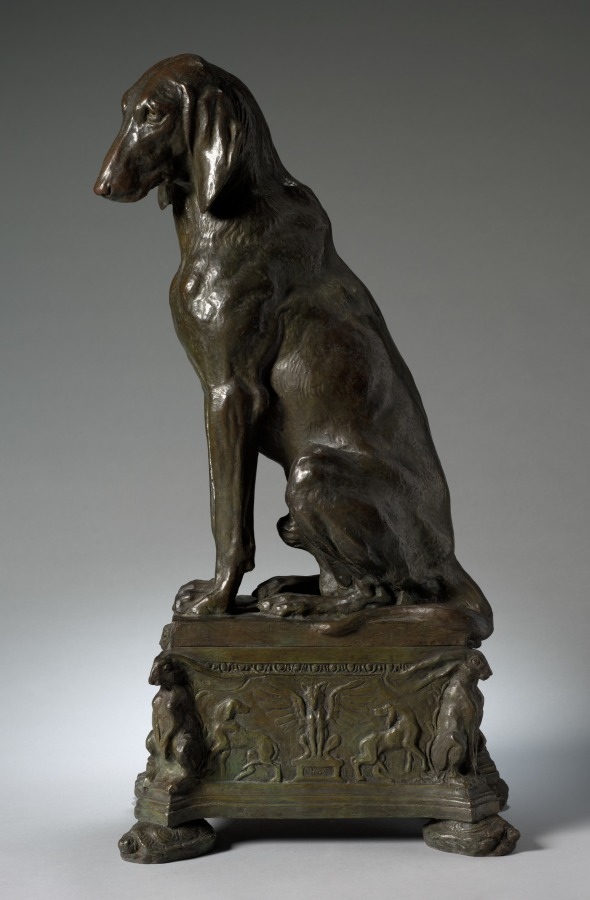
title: Hound (2 of 2)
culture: America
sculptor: Charles Cary Rumsey (American, 1879–1922)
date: 1912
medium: bronze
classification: Sculpture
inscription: Signed on plinth: © C. C. Rumsey